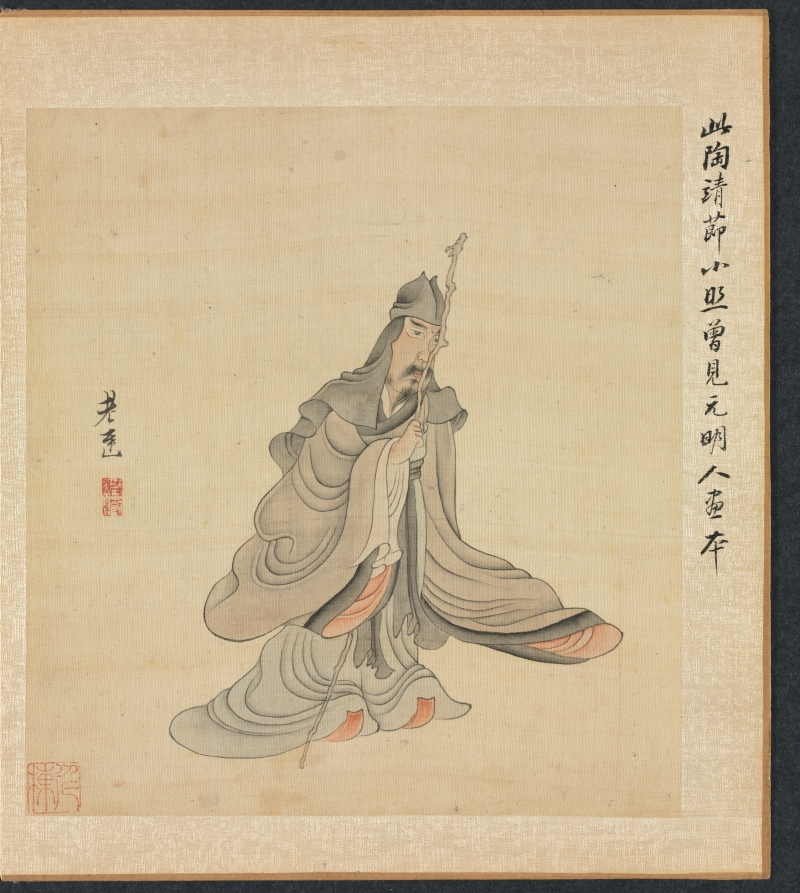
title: Paintings after Ancient Masters: Portrait of Tao Yuanming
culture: China, Ming dynasty (1368–1644)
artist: Chen Hongshou (Chinese, 1598/99–1652)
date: 1598–1652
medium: Album leaf; ink and color on silk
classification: Painting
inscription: 老蓮. [印] 洪綬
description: Poet Tao Yuanming (365–427 CE) turned down a career as an official in politically turbulent times to return to his home estate, northwest of Mount Lu, to write poetry and enjoy his garden and wine. Having an ailing foot, he was carried in a basket or walked with a staff. As he grew chrysanthemums, Tao is associated with this flower. The artist Chen Hongshou, active in Zhejiang province, suffered through the violent transition from the Ming to the Qing dynasty around 1644. By portraying the poet who lived a millennium earlier during similarly fraught times, Chen intentionally chose an archaistic style.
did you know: Chen Hongshou made this double-album with twenty paintings for a friend, Lin Zhongqing.